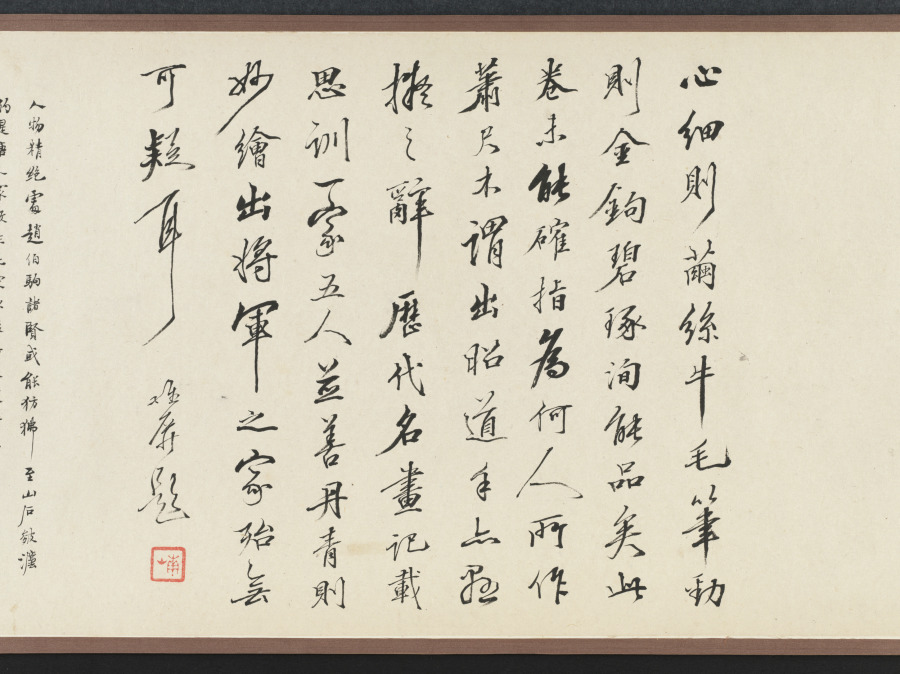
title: Waiting for the Moon in the Mid Autumn Festival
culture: China, Ming dynasty (1368–1644)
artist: Shi Rui (Chinese, c. 1400-c. 1470)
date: 1400s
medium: handscroll, ink, color, and gold on silk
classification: Painting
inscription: [印] 石氏以明; 游戯翰墨.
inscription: 僊山樓觀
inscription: 1 inscription, dated 1639, and 1 seal of Xiao Yuncong 蕭雲従 (1596-1673). Inscription by Xiao Yuncong: This is a painting by the Junior General Li. The painting is damaged and cracked at many places. Many of the paper strips for backing have been missing since long ago, but the colors are still fresh as if they had just been applied and the ink still looks moist. During the reign of Tianbao (742-756) of the Tang Dynasty, the Imperial Klansman Li Sixun was summoned to paint the walls of the Datong Hall. He was known as the "Senior General." His son, who came to be known as the "Junior General," was named Zhaodao. Of the stone epitaph [Li Sixun bei, or the "epitaph of Li Sixun," one of the best known calligraphic monuments of the Tang Dynasty], engraved with the calligraphy of Li Beihai 李北海 [Li Yong 李邕, 678-747], more than half has fallen off. Why, in contrast, was this painting able to survive? Or could it be that despite the fact that the stone is hard and the silk is soft, their preservation or destruction depends on some other factors? Moreover, since they were titled nobility of imperial descent, it is doubtful that they had the leisure and the mood to indulge in such decorative and descriptive blue and gold painting for the mere amusement of their fellow men. Recently, I read the Yi zhou ming hua lu 益州名畫錄 [by Huang Xiufu 黃休復, preface 1005]. I found a certain Li Chin-nu who compared himself with Li Zhaodao 李昭道 and was called by the Sichuan people the Junior General Li. In a painting which he did, entitled Mt. Ch'ing-ch'eng, the architectural structure of the pavilions, terraces, bridges, and boats are meticulous and accurate. The horsemen on a spring outing are as small as grain and the wild geese among the clouds as tiny as dust. It was also said that he painted on silk of any length in accordance to specific commissions. Is it possible that this painting is one of his? Since that time 700 years have passed. Yet one of the two Junior General Li's must be our painter. Formerly, there were the so-called "Four Excellents" in the Hall of Portraits of the Buddhist monk Wu-ta Kuo-shih: the [portrait] painting by Ch'ang Ts'an [act. ca. 881-888}, the calligraphy by Priest Tao-ying, the eulogy by Li Shangyin 李商隱 [813-858], and the landscape by Li Sheng [act. ca. 908-925]. This Li Sheng was styled Chin-nu and was also called Junior General Li. In the tenth month of the Chi-mao year, the twelfth year of the Chongzhen era [1639], recorded by Xiao Yuncong of Wuhu. trans. WKH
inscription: 4 colophons and 30 additional seals: 1 seal of Xu Qianxue 徐乾學 (1631-1694); 1 seal of Li Chien 黎簡 (1747-1799); 1 seal of Chang Chin-fang (18th c.); 2 seals of Sun Erzhun 孫爾準 (1770–1832); 1 colophon and 2 seals of Zhang Weiping 張維屛 (1780-1859); 1 seal of Wu Rongguang 吳榮光 (1773-1843); 1 colophon and 2 seals of Luo Tianchi 羅天池 (1826 jinshi); 7 seals of Wu Yanhui 伍元蕙 (active 1821–1851); 2 colophons and 4 seals of Pan Zhengwei 潘正煒 (1791-1850); 9 seals unidentified.